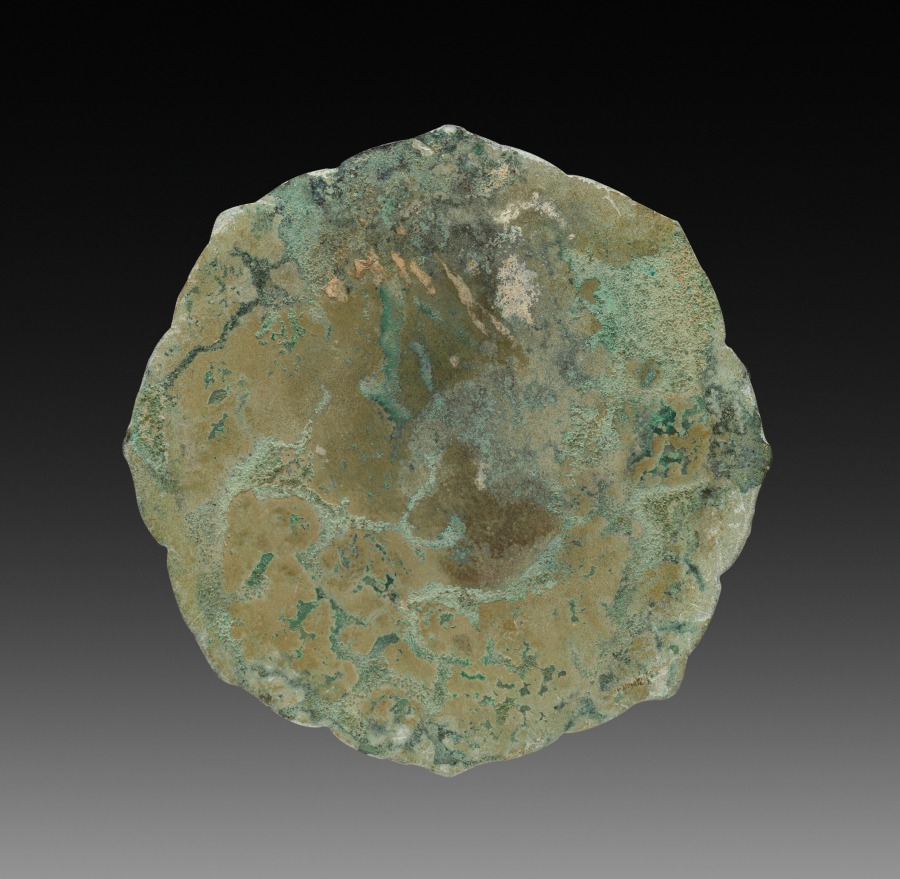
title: Mirror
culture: Japan, Heian period (794–1185)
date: 794–1185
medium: bronze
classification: Metalwork